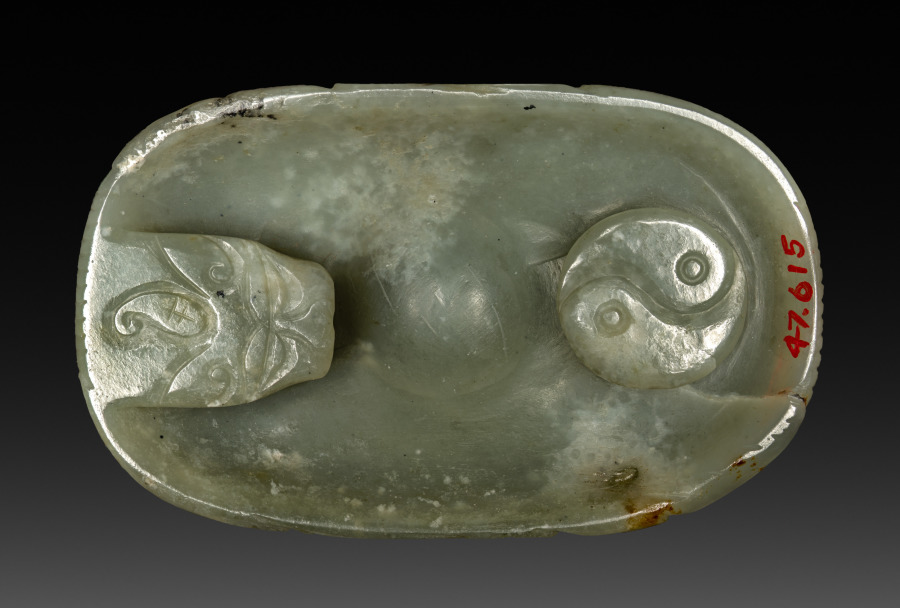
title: Buckle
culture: China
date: 1900s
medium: green jade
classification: Jewelry